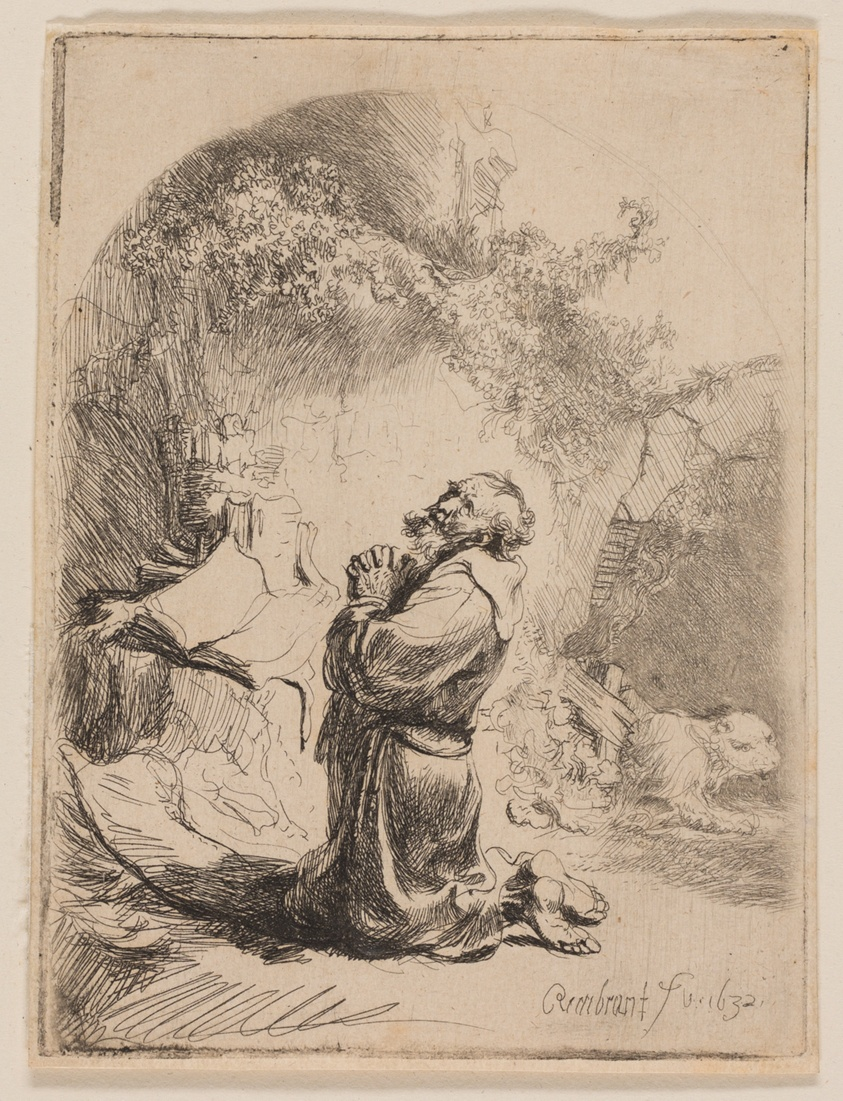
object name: Print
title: St. Jerome Praying: Arched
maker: Rembrandt van Rijn (Dutch, 1606-1669)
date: 1632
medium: Etching and drypoint on paper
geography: Holland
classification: etching; print; prints and drawing; paper; drypoint